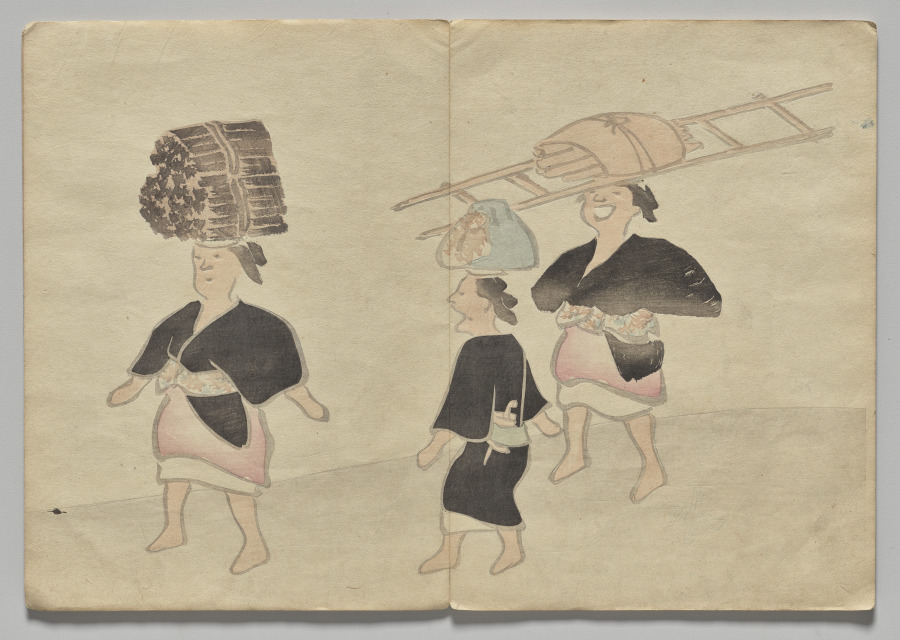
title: Scene from The Kōrin Picture Book (Volume 1)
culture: Japan, Edo period (1615–1868)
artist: Nakamura Hōchū (Japanese, d. 1819)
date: 1800s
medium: color woodblock printed book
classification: Bound Volume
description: Ogata Korin (1658-1716) was one of the most admired artists of Rimpa, or "decorative school painting." These books by the charming later-generation Rimpa artist Hochu record Korin's inventive designs.